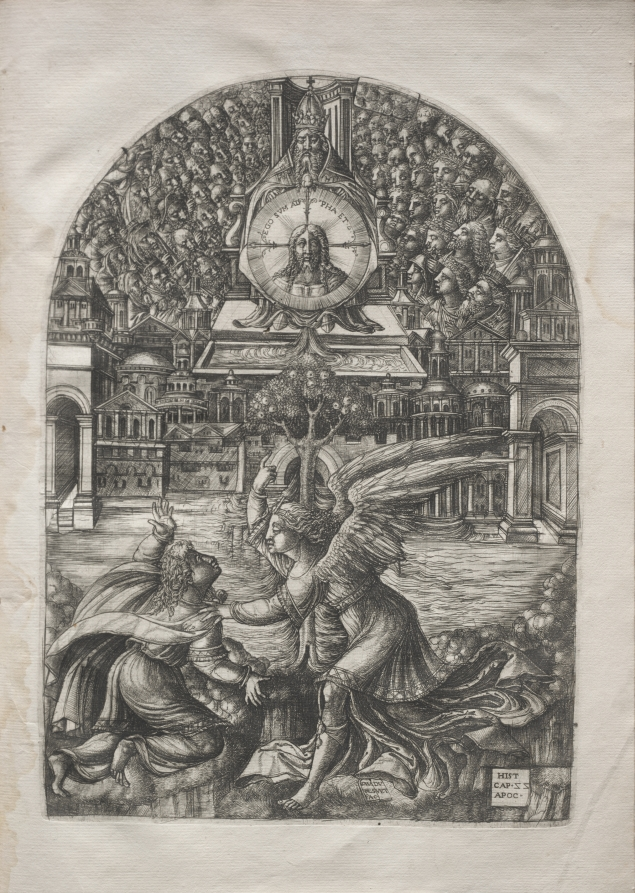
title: The Apocalypse: The Angel Shows St. John the Fountain of Living Water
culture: France, 16th century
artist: Jean Duvet (French, 1485–1561)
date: 1546–1556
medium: engraving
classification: Print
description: This print is part of a bound volume of works illustrating the a narrative of the Apocalypse, taken from the Revelation of Saint John in the Bible. The 23 engravings in the series occupied the artist for a number of years and represent his greatest artistic achievement. The museum's volume is one of only seven known complete sets. Jean Duvet was one of the first major printmakers in France and one of the most original artists of the 1500s. Although he worked mostly in the provincial city of Langres, he became aware of Italian art through the circulation of prints—notably those of Marcantonio Raimondi. His solidly modeled human figures reflect the influence of the Italian High Renaissance. Duvet, however, developed an idiosyncratic, highly artificial style with crowded compositions that ignore rational space in favor of ornamental surface patterns.